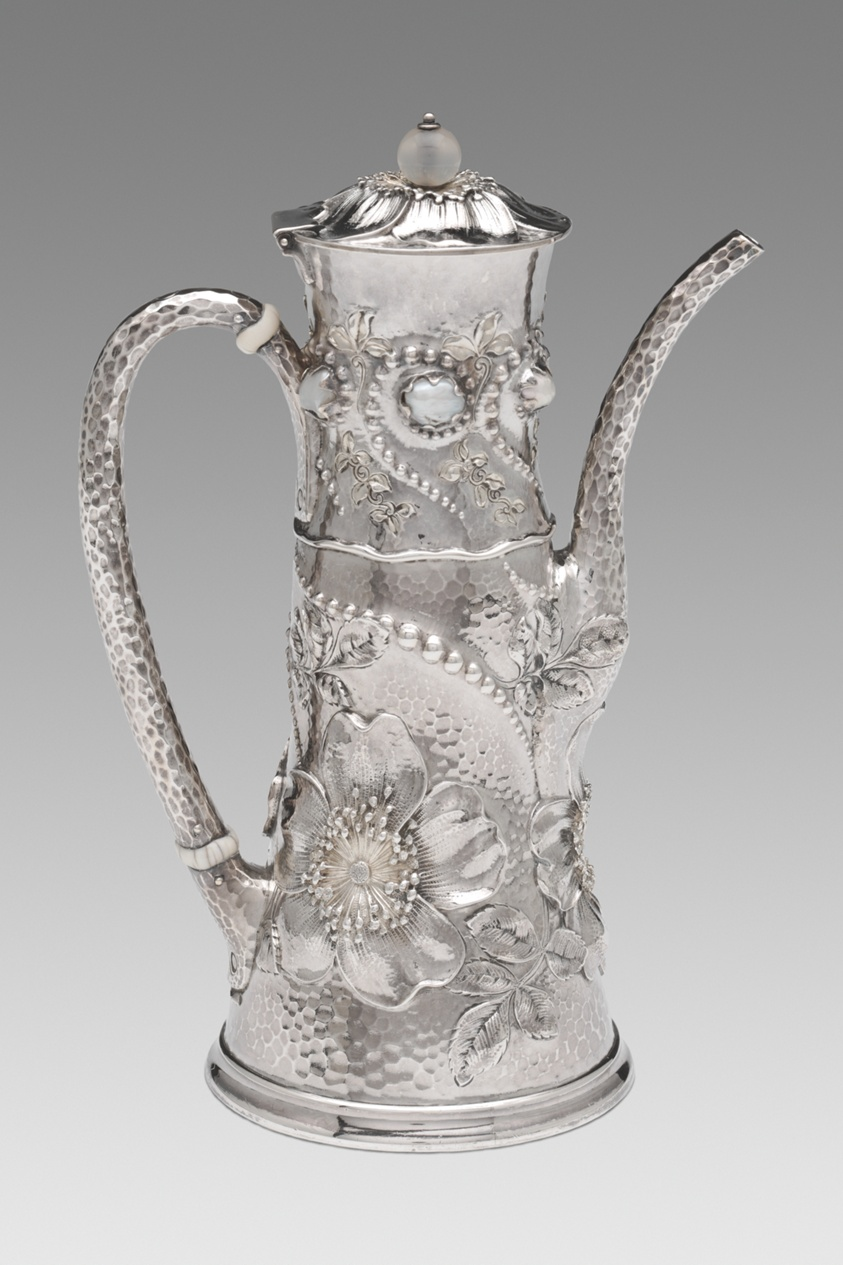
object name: Metalwork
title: Coffee Pot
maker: Design attributed to Charles Osborne (American, 1847–1920); Tiffany and Company (American, founded 1837); New York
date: 1881–89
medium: Silver, pearls, chalcedony, and ivory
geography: New York City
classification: coffeepot; silver; american decorative arts; american arts; decorative arts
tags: dining, drinking